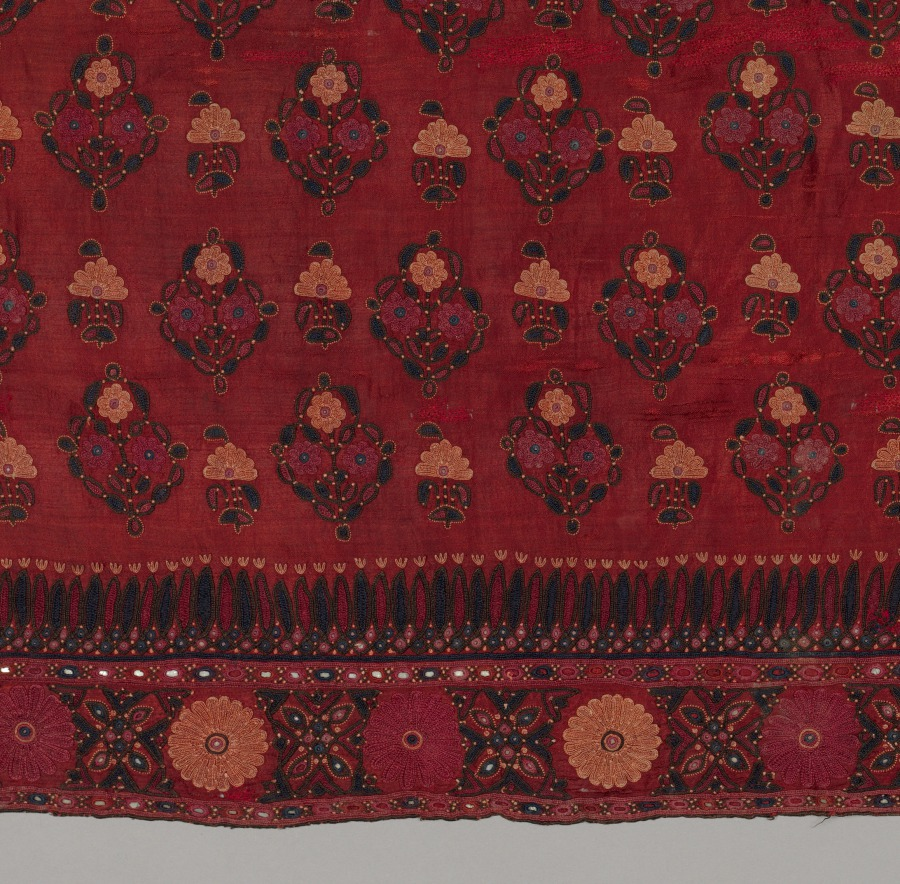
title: Fragment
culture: Western India, Gujarat, Kachchh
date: 1800s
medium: embroidery with mirror inserts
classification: Embroidery